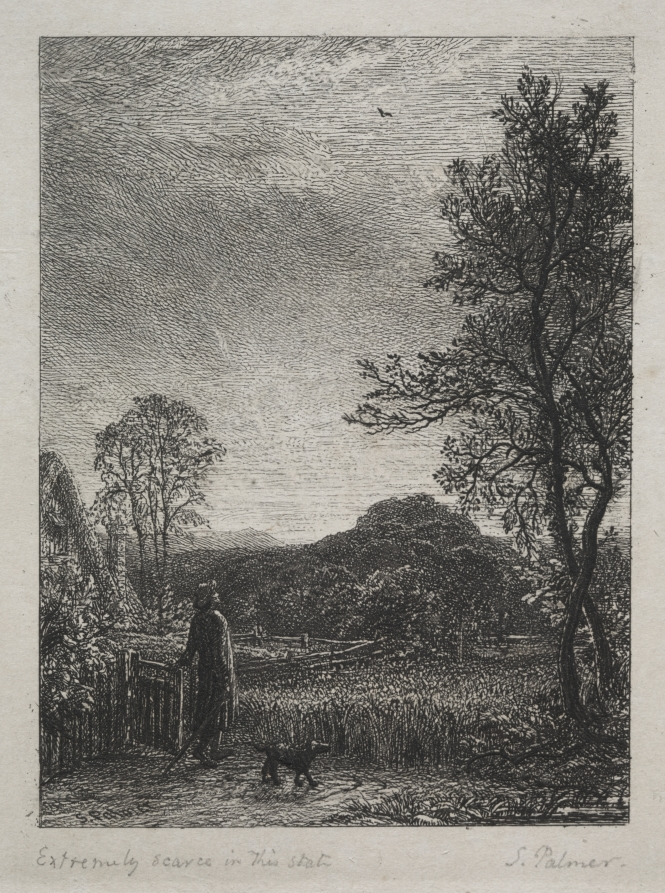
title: The Skylark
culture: England, 19th century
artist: Samuel Palmer (British, 1805–1881)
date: 1850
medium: etching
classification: Print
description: Palmer came to printmaking relatively late in his career in 1850 when he was elected to the Etching Club in London. He created a significant number of landscape etchings, intricate in detail and sonorous in chiaroscuro. In The Skylark, one of Palmer’s earliest compositions, a solitary figure in a rural landscape contemplates the flight of a songbird. Palmer has been compared to the German Romantic artist Caspar David Friedrich (also in this exhibition), who produced images infused with a similarly indefinable atmosphere of calm, mystery, and breathless silence.